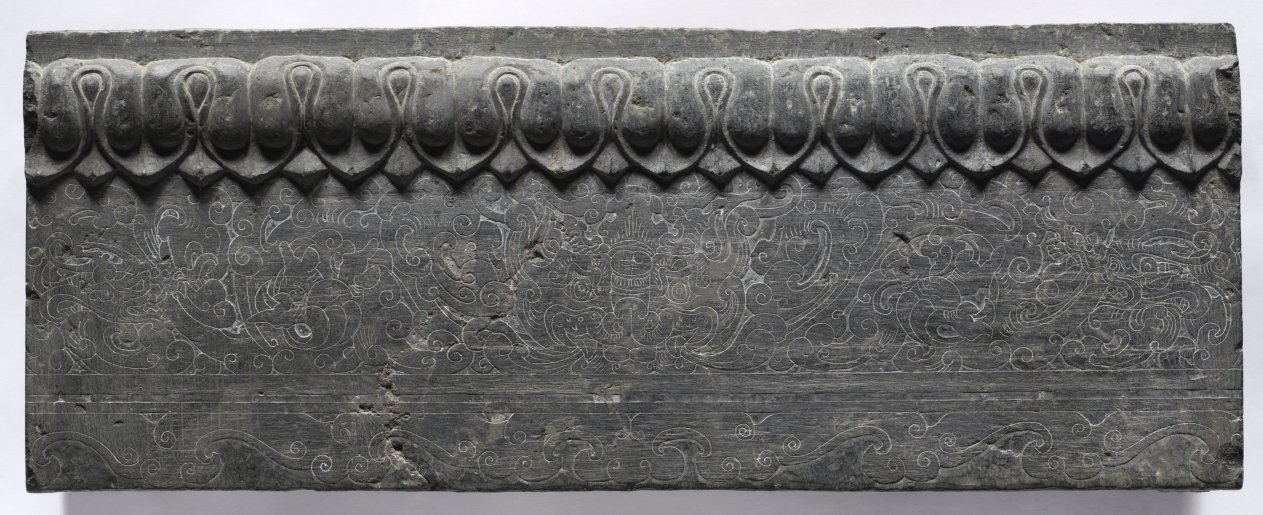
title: Section of a Coffin Platform: Horizontal Panel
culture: China, Northern Qi dynasty (550-577)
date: 550–577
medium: limestone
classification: Sculpture